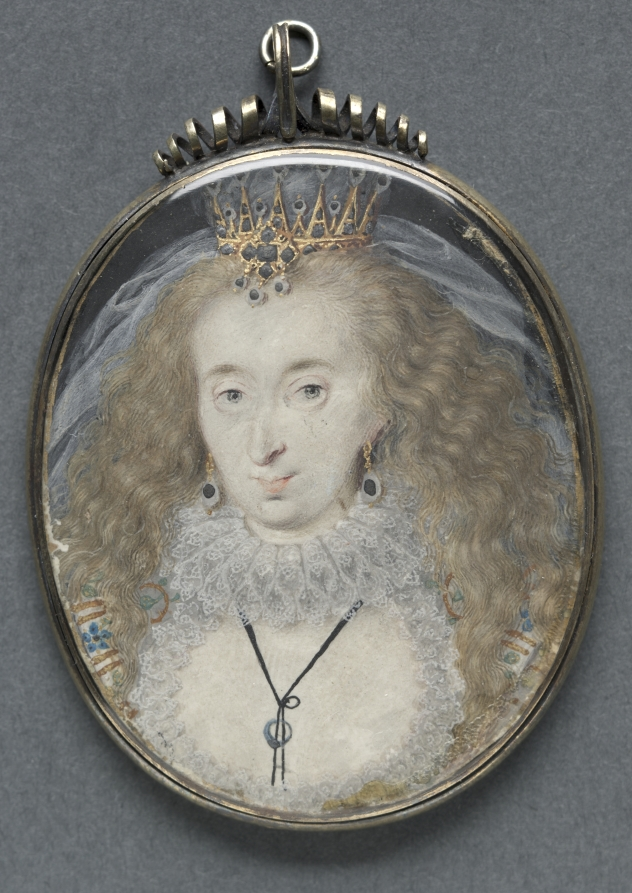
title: Portrait of Lucy Russell, Countess of Bedford, née Harrington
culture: England, early 17th century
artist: Isaac Oliver (French, c. 1565–1617)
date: c. 1608–1616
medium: watercolor on vellum with gold and silver in a 17th-century silver gilt frame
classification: Portrait Miniature